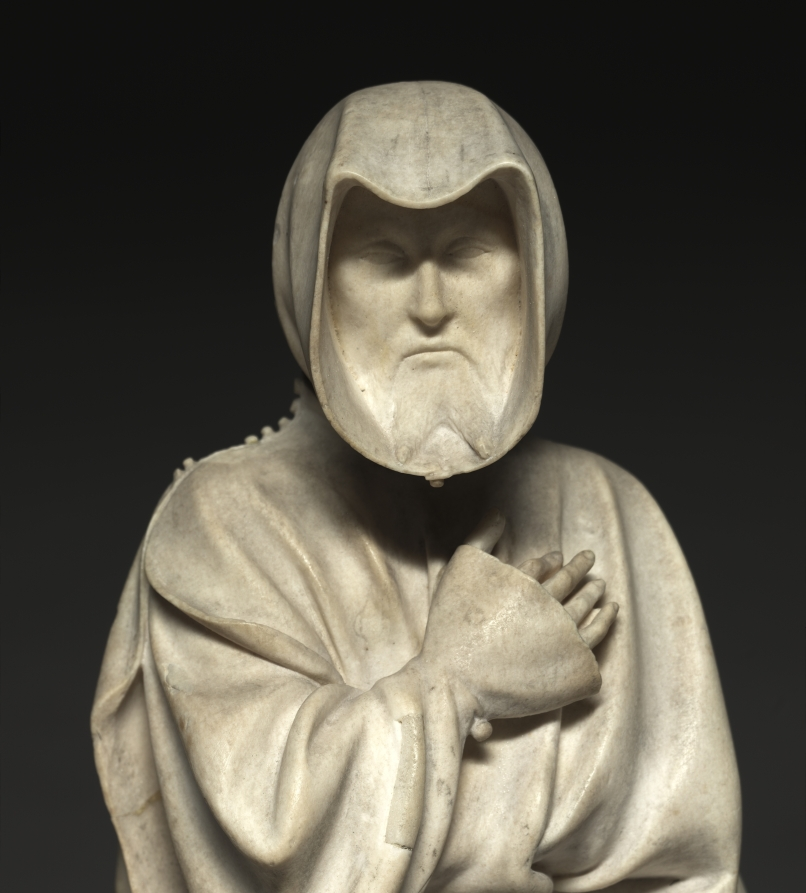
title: Mourner from the Tomb of Philip the Bold, Duke of Burgundy (1364–1404)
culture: Netherlands, active Dijon, 15th century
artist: Claus de Werve (Netherlandish, 1380–1439)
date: 1404–10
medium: vizille alabaster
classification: Sculpture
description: This figure comes from the tomb of Duke Philip the Bold from the church of Champmol near Dijon (Burgundy, France). Philip, who founded the monastery and designated it as his burial place, hired the best artists, many of whom came from the Netherlands. While the commission was given in 1381, the work was not completed until 1410, six years after the duke’s death. This mourner is unusual for the time because it is not carved as a static low relief on the pedestal of the tomb but interacts with the viewers and their fellow procession members. The lifelike quality of the figure is due in large part to the alabaster. Its softness allowed artists to carve details into the material, and the transparent, milky white stone could also be polished to a high gloss.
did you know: A plaster cast of this mourner decorates the empty niche in the Tomb of Philip the Bold in Dijon, France.